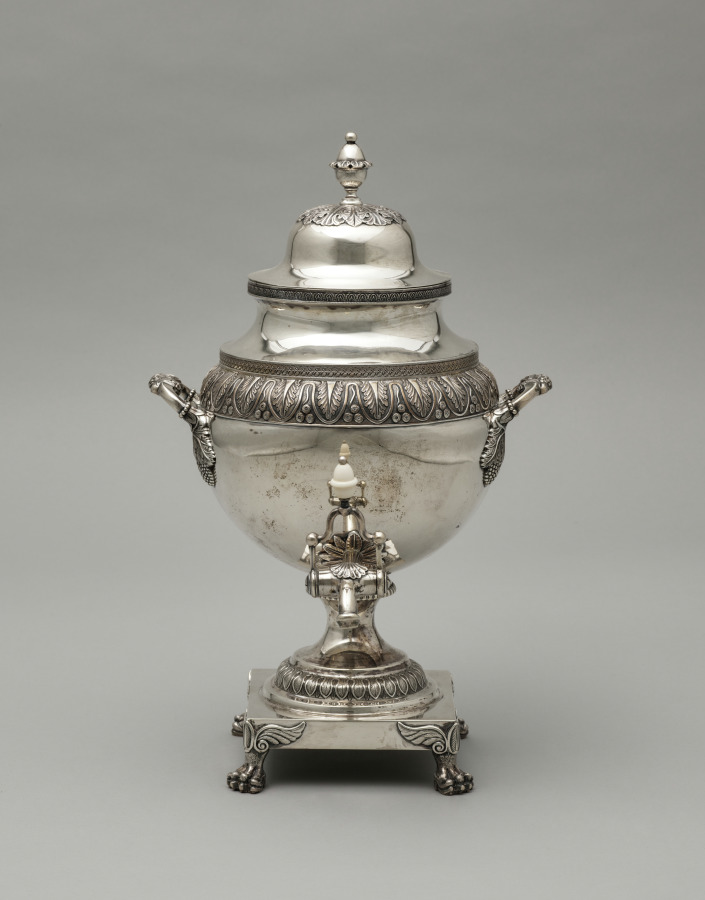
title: Tea Urn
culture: America, Pennsylvania, Philadelphia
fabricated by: Harvey Lewis (American, 1835)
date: 1811–25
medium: silver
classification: Silver